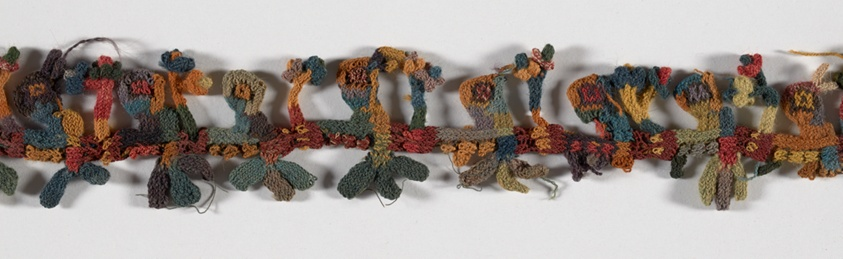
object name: Textile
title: Border Fragment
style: nazca, andean, andes, Pre-Columbian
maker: Nazca; South coast, Peru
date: 100 B.C./A.D. 200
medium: Wool (camelid), tubular cross-knit looping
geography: Peru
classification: textile; weaving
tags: super/natural